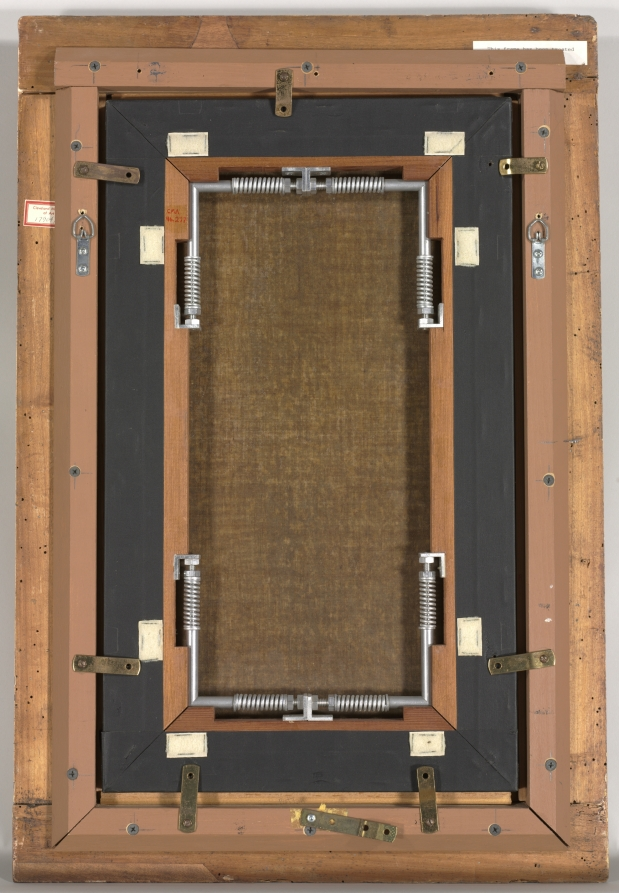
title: Study for "The Martyrdom of Saint Sebastian" (for the Augustinian monastery at Diessen, Germany)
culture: Italy, 18th century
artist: Giovanni Battista Tiepolo (Italian, 1696–1770)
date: 1739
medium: oil on canvas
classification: Painting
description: In 1739 a pair of monumental altarpieces by two Venetian painters (Giovanni Battista Tiepolo and Giambattista Pittoni) were installed in a church in southern Germany, part of a carefully orchestrated decorative program that included architecture, painting, sculpture, and decorative stuccowork. This sketch is Tiepolo’s initial design for his altarpiece, submitted for approval before beginning the final work. With quick, assured brushstrokes, he represents the Christian martyr Sebastian bound to a tree and shot with arrows, flooded with radiant light to symbolize his devotion to his faith.